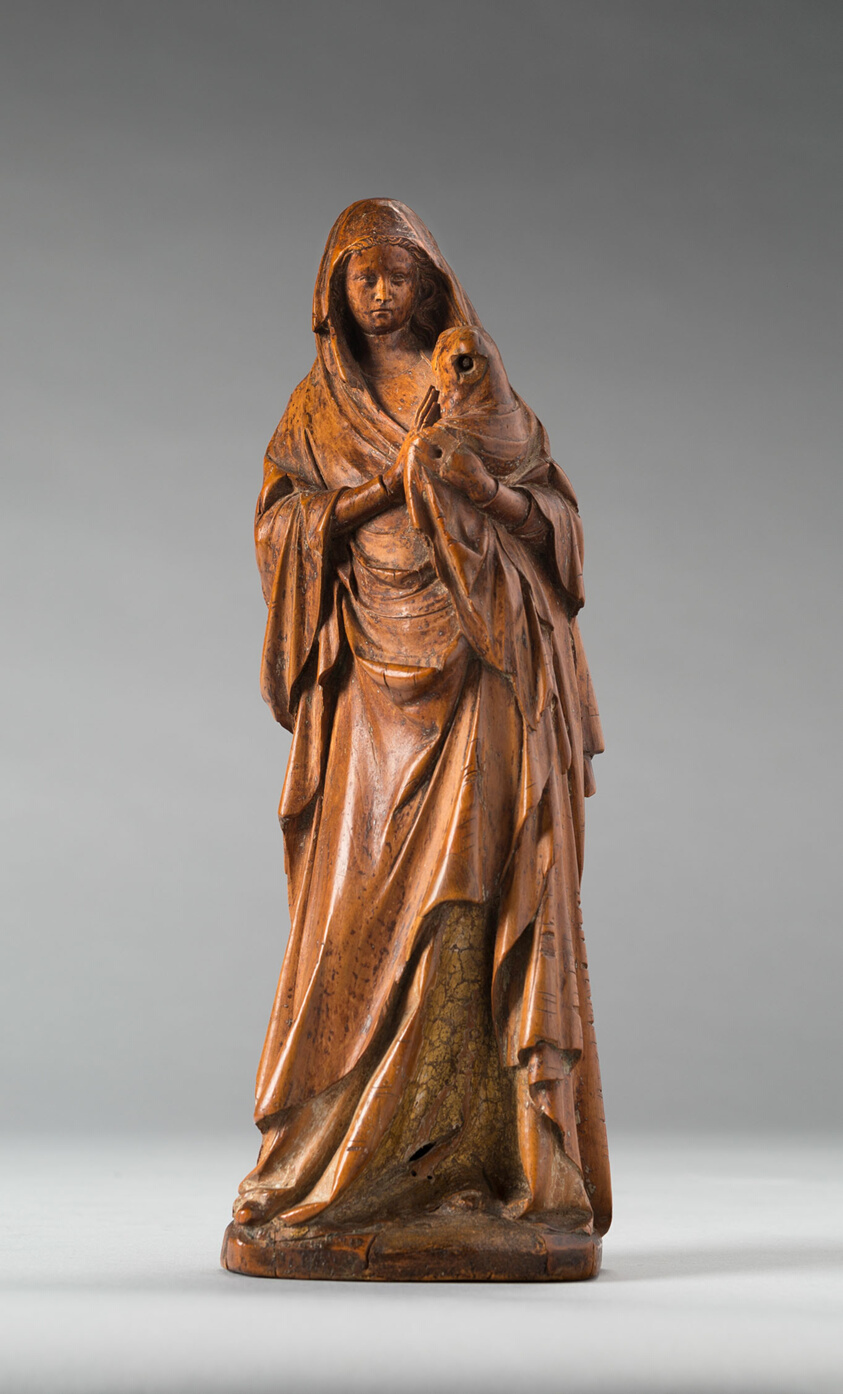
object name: Sculpture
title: Virgin and Child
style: medieval, 14th century, 15th century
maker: French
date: 1375/1400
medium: Wood with traces of gilt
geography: France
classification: statuette; sculpture; figure; sculpture/wood; wood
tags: Virgin and child/Madonna and child, boys, woman, figures, figure, Christianity, Christian subjects, religious figures, religious, religion, sons, babies, child, mother and child, mother, Jesus, Virgin Mary